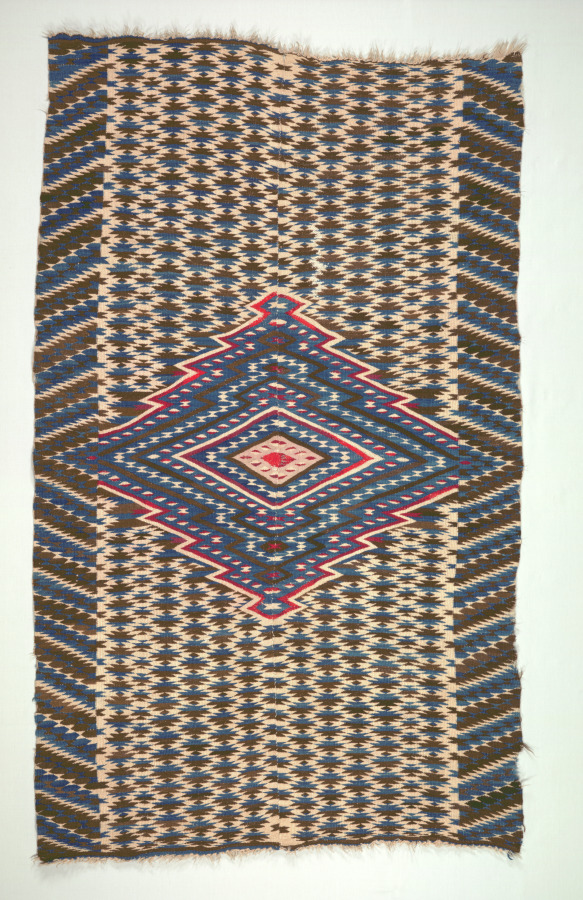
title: Saltillo Style Blanket/Sarape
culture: America, Native North American, Southwest, Rio Grande Hispanic, Post-Contact, Classic Period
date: c. 1860–1875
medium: tapestry weave: wool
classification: Textile